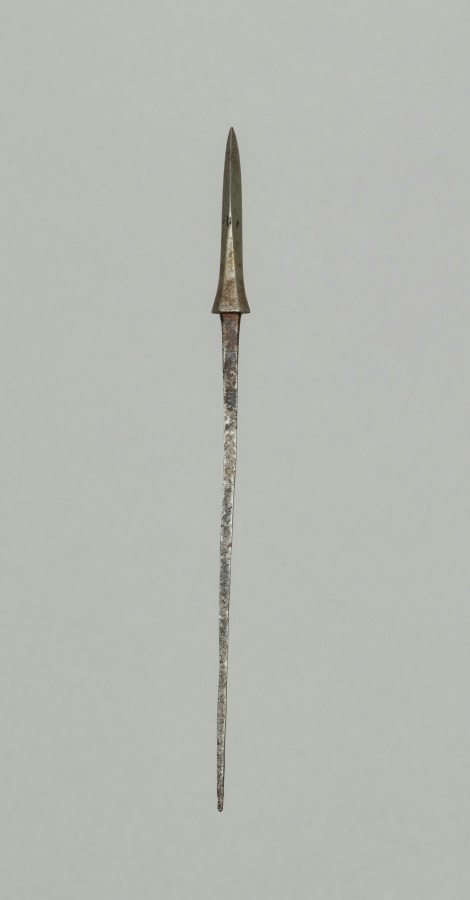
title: Arrow Point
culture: Japan, Edo period (1615–1868)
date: 1700s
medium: steel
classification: Arms and Armor